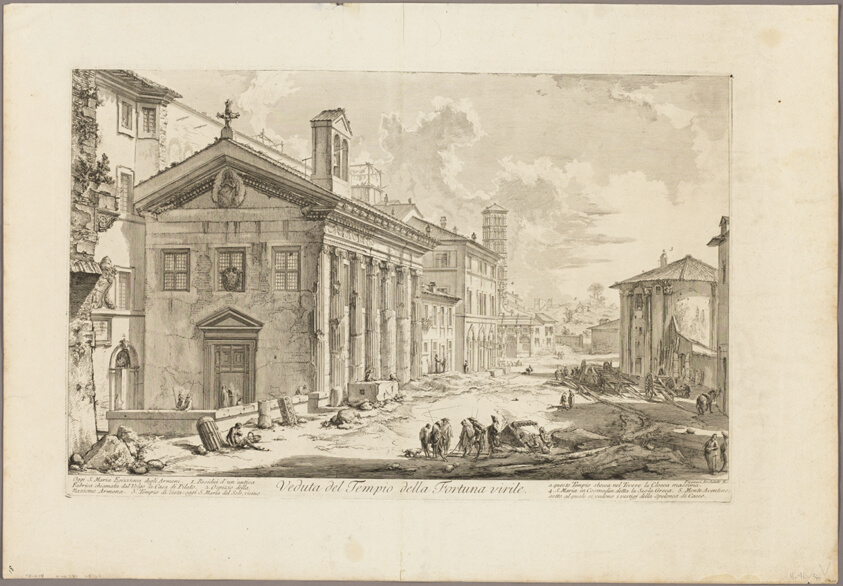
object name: Print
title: View of the Temple of Fortuna Virilis. Now the Armenian church of S. Maria Egizziaca, from Views of Rome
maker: Giovanni Battista Piranesi (Italian, 1720-1778)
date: 1750/59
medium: Etching on heavy ivory laid paper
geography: Italy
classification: etching; print; prints and drawing